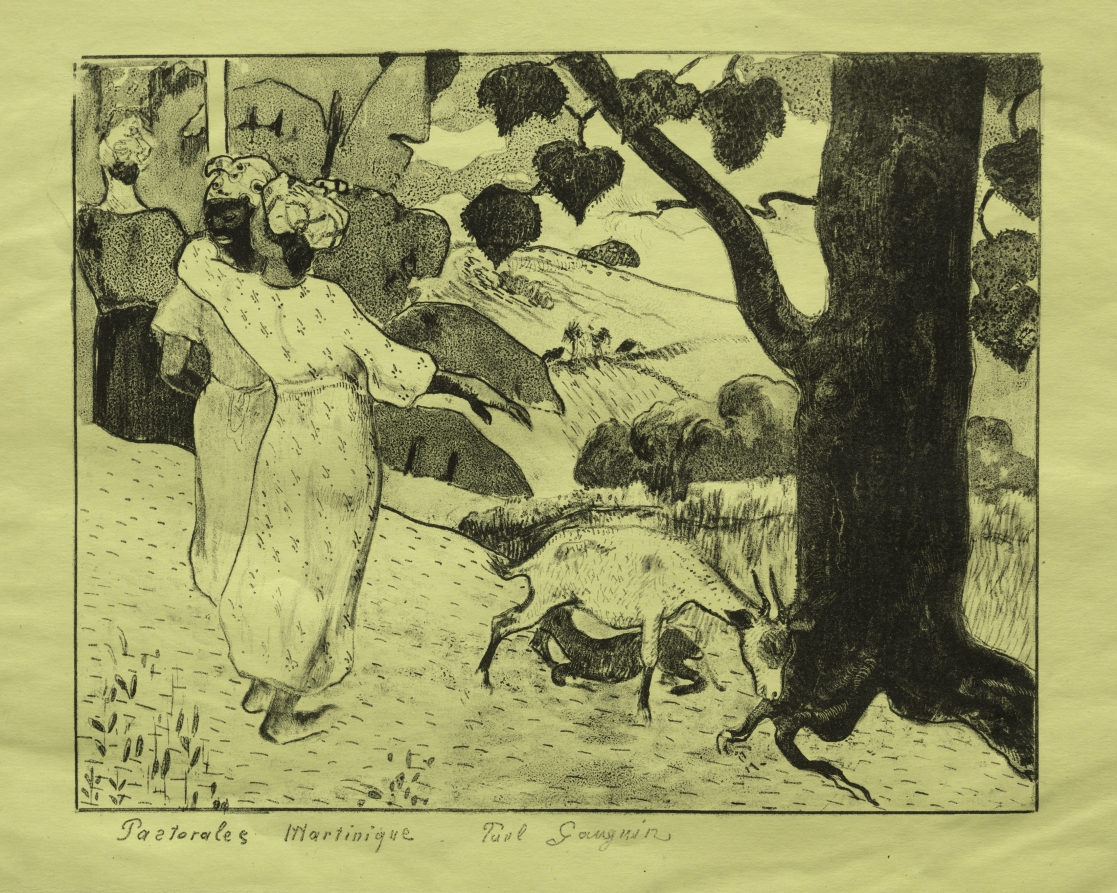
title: Volpini Suite: Martinique Pastoral (Pastorales Martinique)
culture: France, 19th century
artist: Paul Gauguin (French, 1848–1903)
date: 1889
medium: zincograph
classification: Print